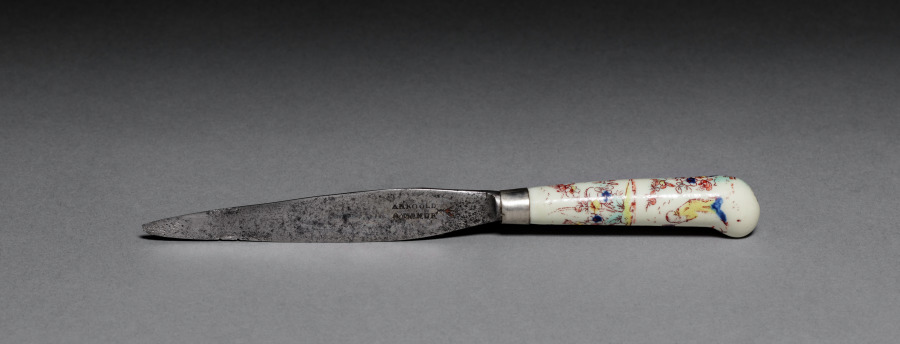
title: Knife Handle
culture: France, 18th century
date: 1725–1750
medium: soft paste porcelain, steel blade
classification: Ceramic